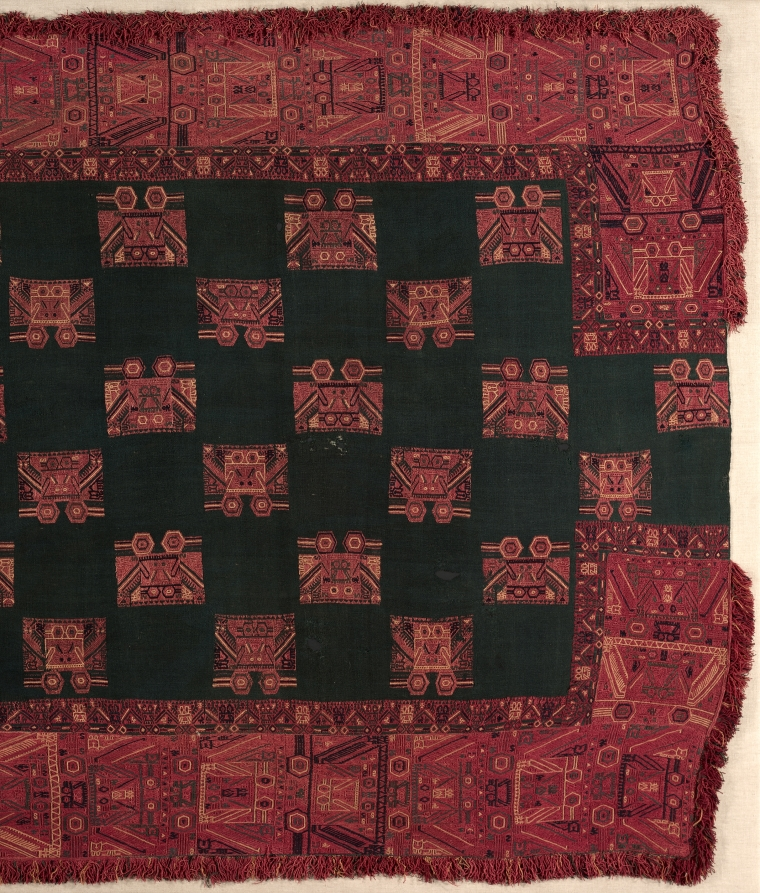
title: Mantle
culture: Peru, South Coast, Paracas (Cavernas) style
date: c. 300 BCE–200 CE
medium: camelid fiber: plain weave with embroidery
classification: Textile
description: Buried in shaft-tombs, or rectangular sunken chambers, the Paracas dead were wrapped in layers of cloth and accompanied by pottery, food, and other offerings. The dry environment of the Paracas Peninsula helped preserve many of these textiles, including richly ornamented garments buried with important individuals. This mantle, probably worn like a cloak, relates closely to the tunic (CMA 1946.227) and long headband (CMA 1946.228) due to their shared imagery. Its double-headed bird motifs— embroidered in vivid red, blue, yellow, and green yarns—likely had symbolic significance, although the specific meaning remains unknown.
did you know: The profusion and decoration of textiles in Paracas burials shows the value placed on cloth.